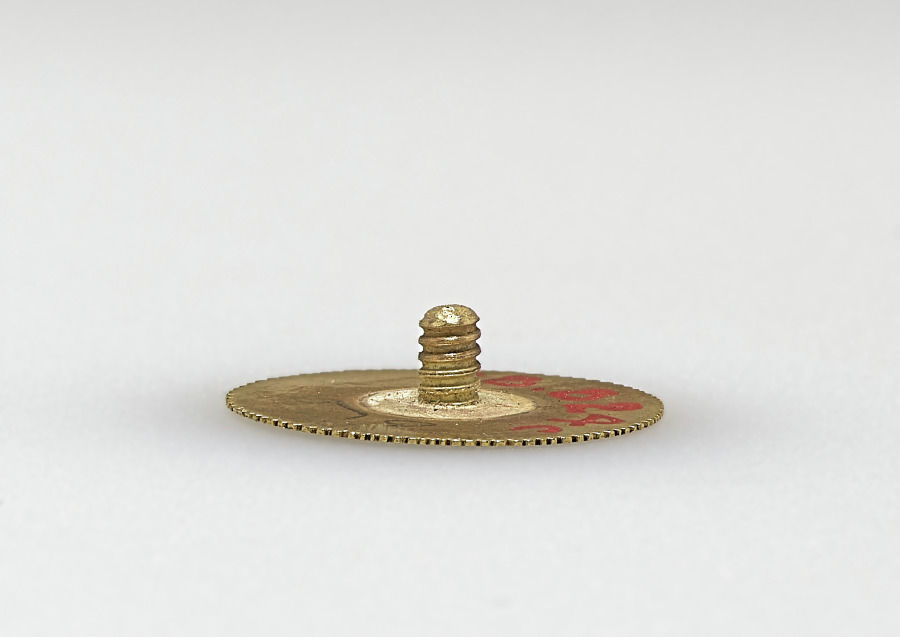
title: Earring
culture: Burma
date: 1800s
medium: gold and rubies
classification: Jewelry